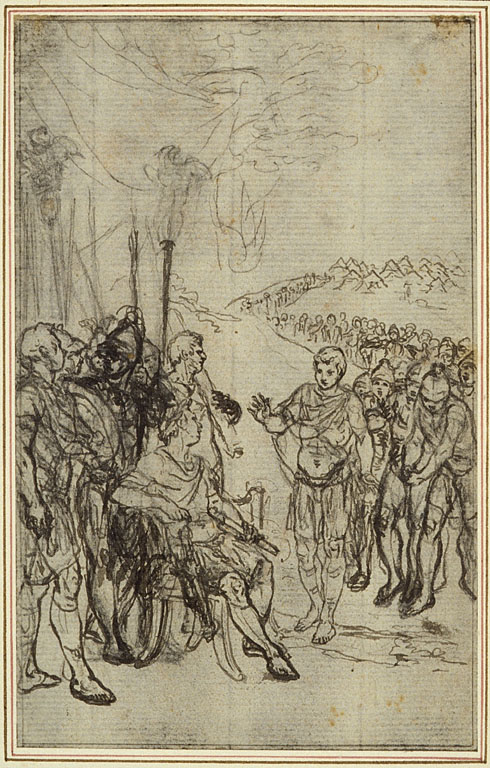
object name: Drawing and Watercolor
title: Study for Lucain's "La Pharsale", Canto IV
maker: Hubert François Gravelot (French, 1699-1773)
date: c. 1766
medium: Pen and black ink, with graphite, on gray laid paper, incised for transfer and perimeter mounted on ivory laid paper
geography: France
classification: pen and ink drawings; drawings (visual works); prints and drawing